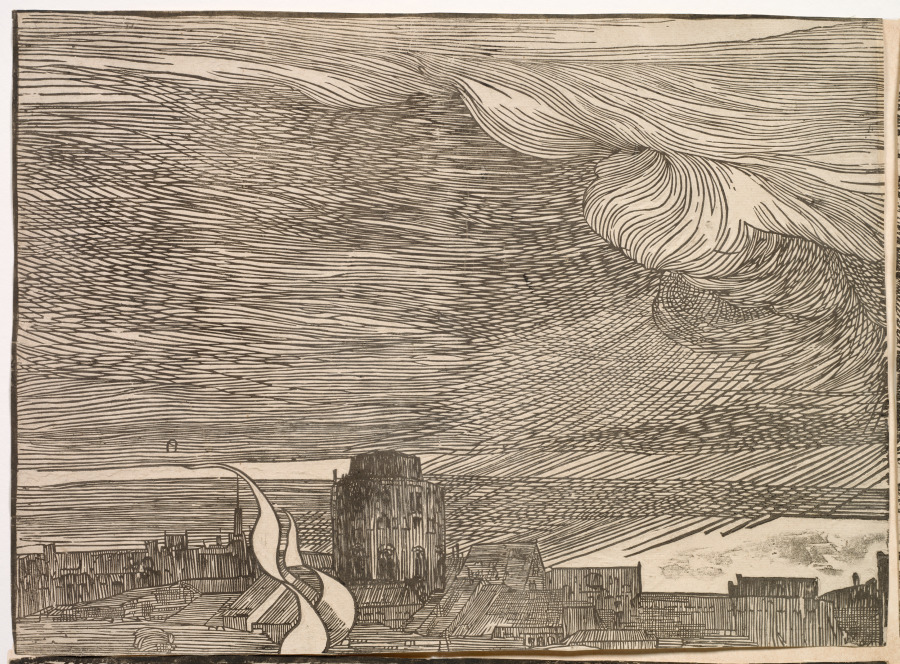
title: The Submersion of Pharaoh's Army in the Red Sea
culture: Italy, Venice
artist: Titian (Italian, c. 1488–1576)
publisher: Domenico dalle Greche (Italian, 1503–1603)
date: 1514–15, printed 1549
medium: woodcut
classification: Print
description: To make this monumental woodcut—considered one of the most ambitious prints of the Renaissance—Titian probably drew directly on the wooden blocks, after which a skilled cutter completed the blocks. The size rivals that of a painting, and the composition would have hung on a wall. Titian’s bold vision presents nature as a vehicle of God’s mercy and wrath. Moses, at right, having parted the seas for the Israelites to pass, commands them to close over the Egyptian forces (Exodus 14:21–31). Titian propelled the narrative with remarkable unity, dedicating entire blocks to the turbulent sea and rolling clouds that culminate in a magnificent cliff and Renaissance city. Some have interpreted the scene as an allegory of Venice’s troubles with the League of Cambrai, a military alliance that threatened the island city.